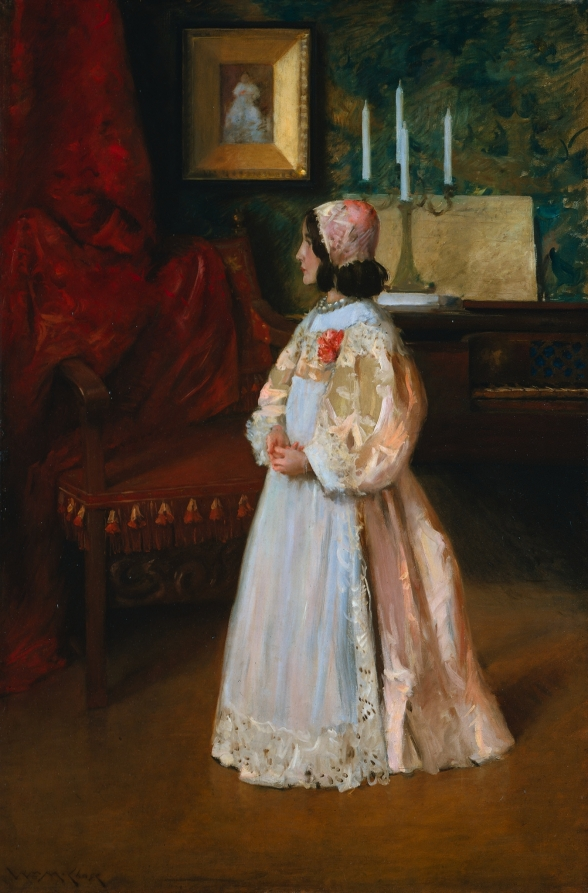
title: Portrait of My Daughter Alice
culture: America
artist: William Merritt Chase (American, 1849–1916)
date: c. 1895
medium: oil on canvas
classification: Painting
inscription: signed lower left: WM M. Chase [WM in monogram]